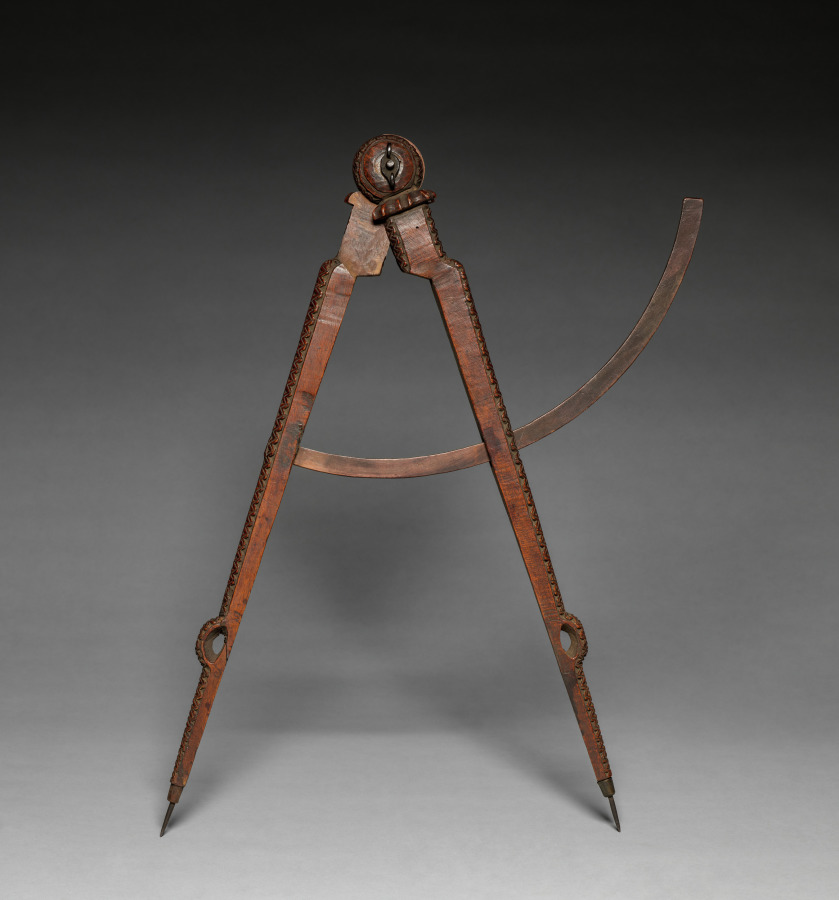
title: Dividers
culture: Scandanavia ?, 17th century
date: 1600s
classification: Tool